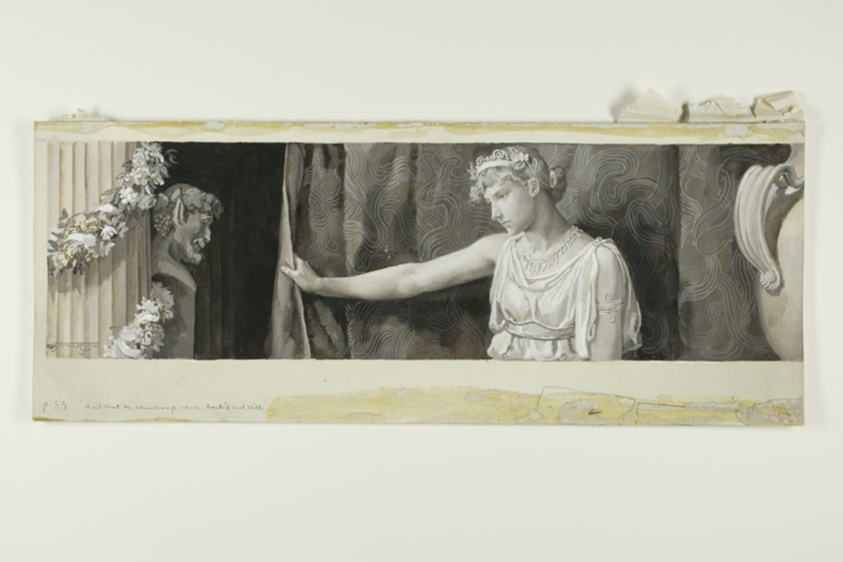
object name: Drawing and Watercolor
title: And Shut the Chamber Up, Close, Hush'd and Still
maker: Will Hicock Low (American, 1853-1932)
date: 1885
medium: Black, gray and white gouache on cream wood-pulp laminate board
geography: United States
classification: drawings (visual works); prints and drawing